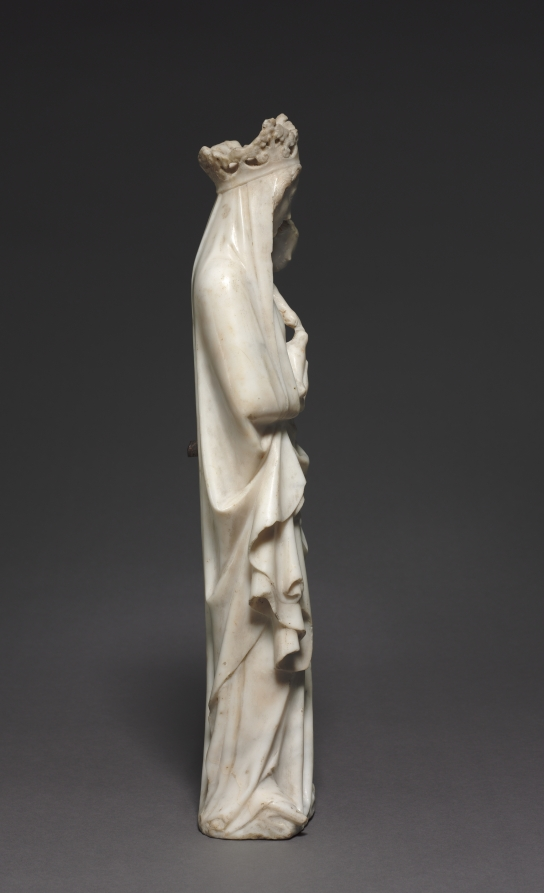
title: Virgin and Child with a Bird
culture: France, Île-de-France, Paris, 14th century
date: c. 1350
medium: marble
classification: Sculpture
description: The Virgin and Child represents one of the most frequent subjects for free-standing sculpture in 14th-century France, motivated by the developing cult of the Virgin and increasing veneration of Mary. Such sculptures were not restricted to churches, but were also found in roadside shrines, entrances to towns, and domestic use in private chapels. The small scale of this statuette suggests it was made for private veneration. The bird, held in the Virgin’s right hand, was a well-known symbol of the human soul and represents Christ’s role as redeemer of humankind.